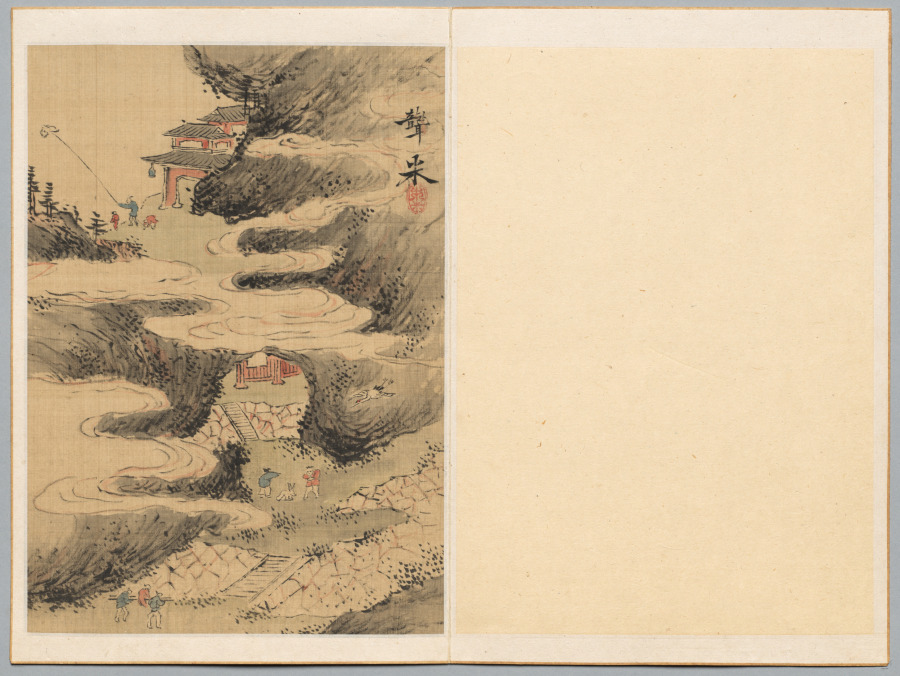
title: Children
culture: Japan, Edo period (1615–1868)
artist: Aoki Mokubei (Japanese, 1767–1833)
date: late 1700s–early 1800s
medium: leaf from a pair of folding albums; ink and light color on paper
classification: Portfolio